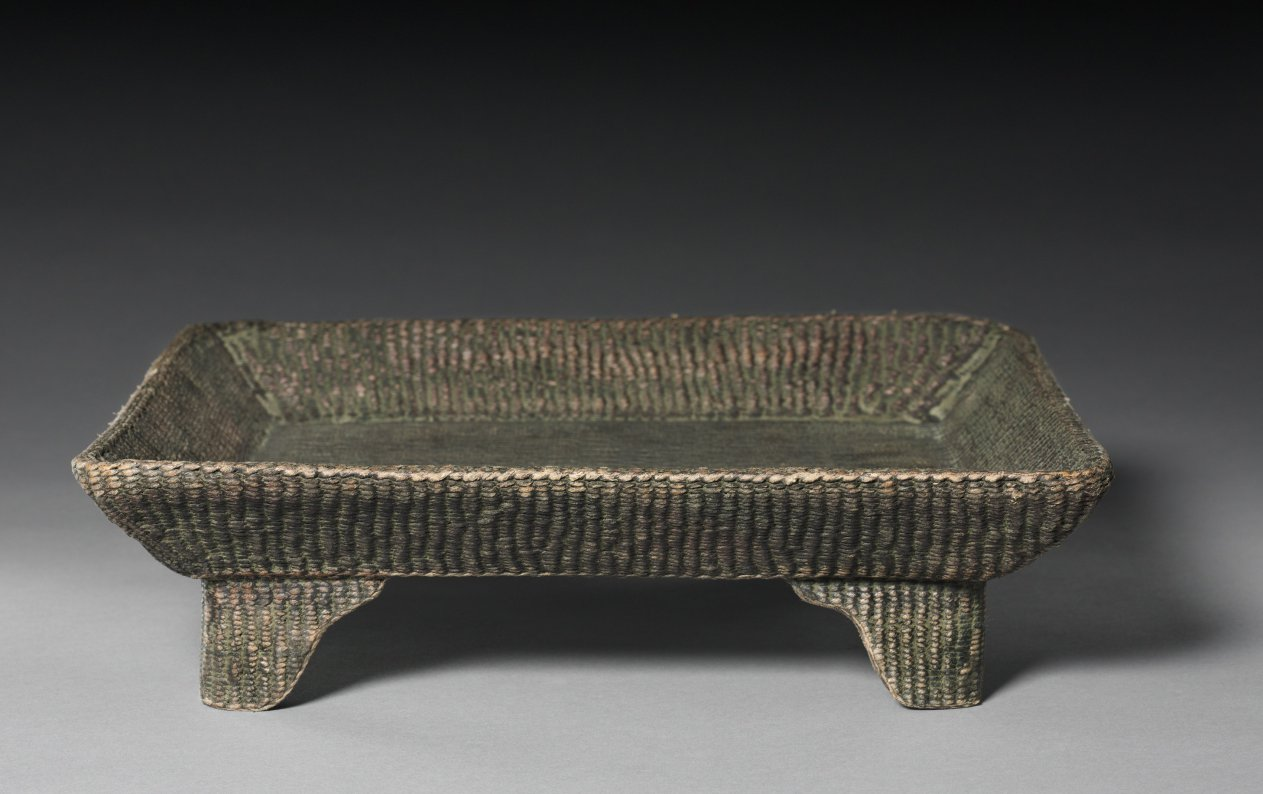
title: Footed Tray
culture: Korea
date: 1900s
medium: lacquer over twisted and coiled paper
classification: Lacquer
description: In Korea, paper has been widely used since the 1800s for constructing stationery and storage boxes, as well as for paraphernalia for the scholar's studio. This tray's modest appearance belies both the laborious process involved in its construction and its status in Korea as an object for the scholar's desk.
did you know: The artist first cords and twines paper before constructing a desired shape.